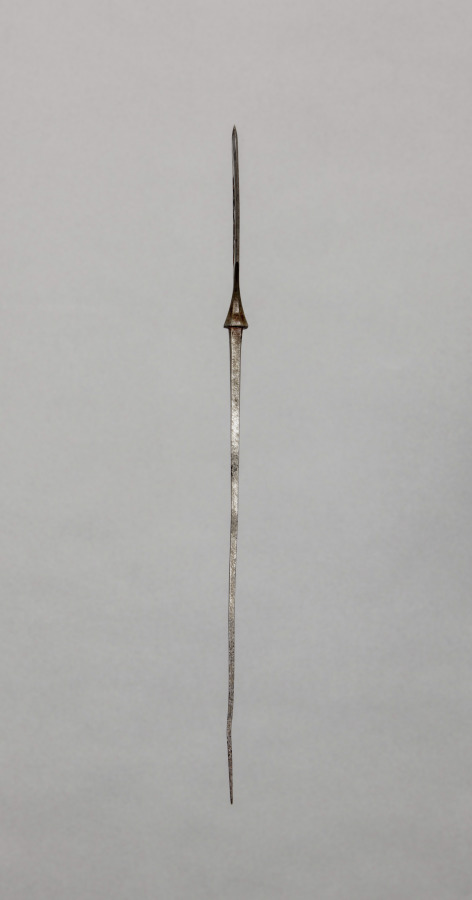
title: Arrow Point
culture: Japan, Edo period (1615–1868)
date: 1700s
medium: steel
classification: Arms and Armor